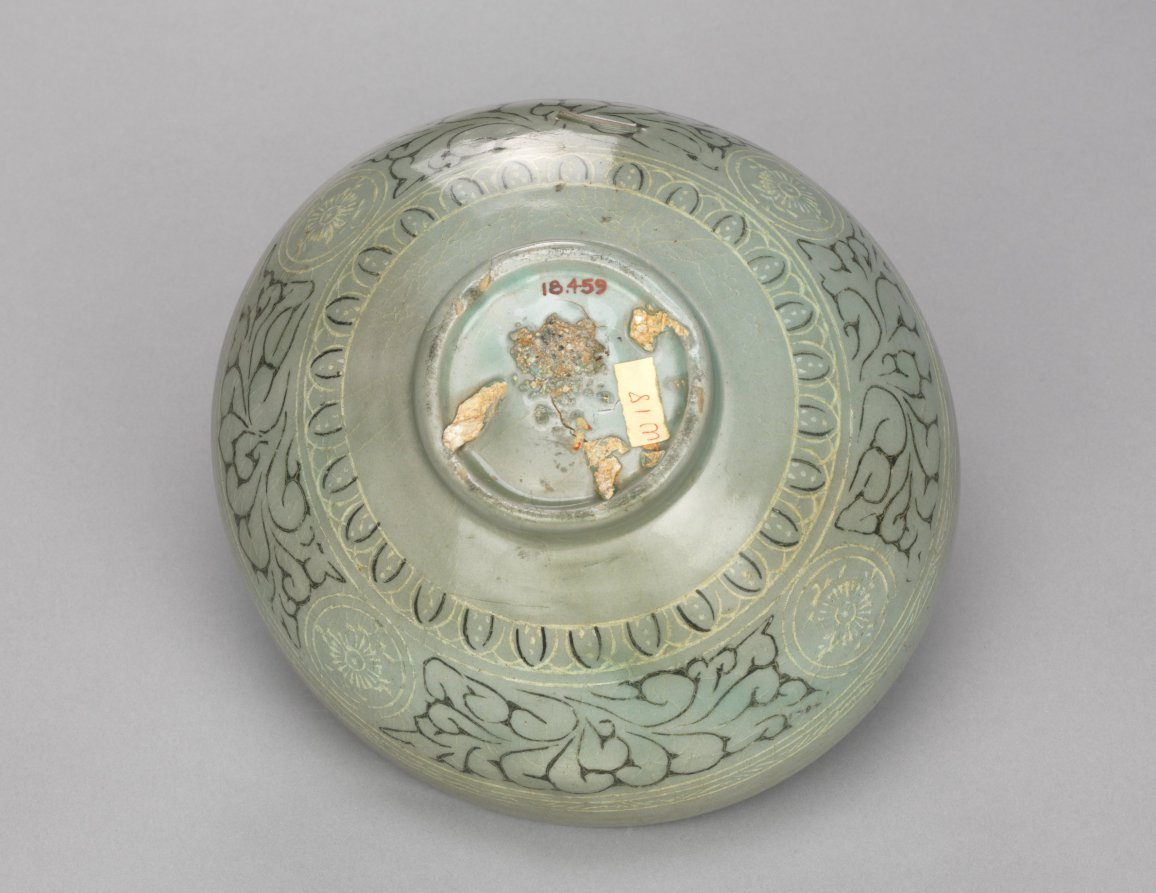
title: Bowl with Inlaid Chrysanthemum and Lychee Design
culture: Korea, Goryeo dynasty (918–1392)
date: 1300s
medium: pottery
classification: Ceramic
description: As early as the seventh century, the practice of drinking tea and wine became an important part of elite leisure culture in Korea. A wide bowl like this example was especially suitable for drinking powdered tea shaved from a compressed tea cake, the most commonly enjoyed type during the Goryeo period. The outer wall is lavishly decorated with the inlaid image of flowering vines, the inner wall with the inlaid image of chrysanthemum and lychee. Such elaborate design tells us that tea wares then were aesthetically invested objects of luxury.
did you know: Kangjin and Buan kilns in Jeolla province were the two major production centers for celadon wares during the Goryeo period (918-1392).